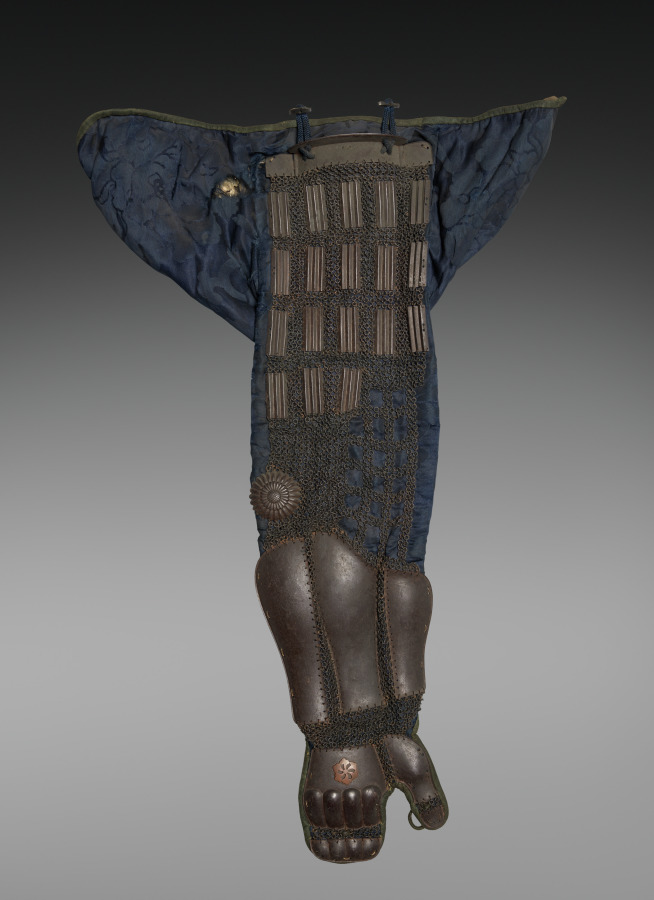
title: Armored Sleeve (Kote)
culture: Japan, Edo period (1615–1868)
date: 1600s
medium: Iron, lacquer, textile (silk)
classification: Arms and Armor